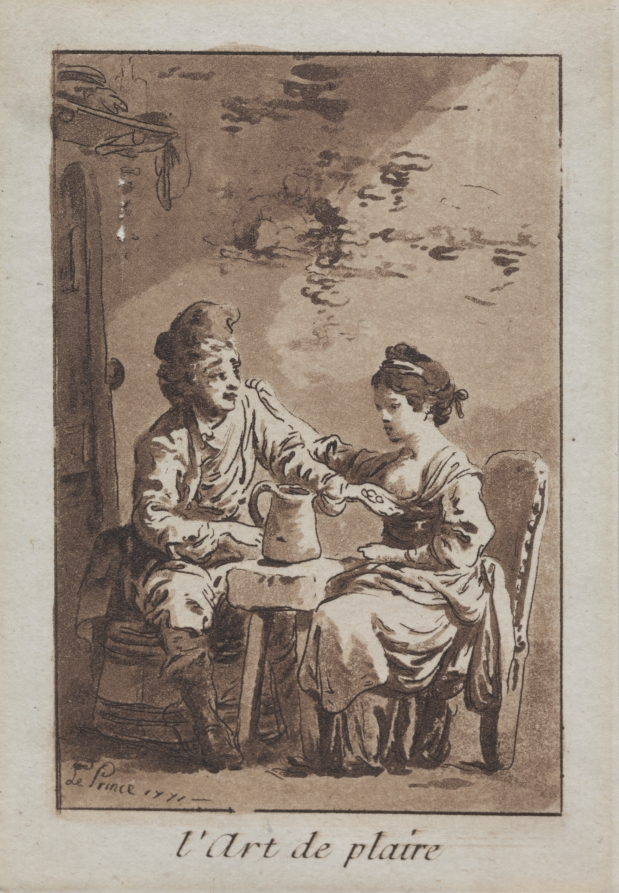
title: The Art of Pleasing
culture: France, 18th century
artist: Jean Baptiste Le Prince (French, 1734–1781)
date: 1771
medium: etching and aquatint printed in brown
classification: Print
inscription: signed and dated in the plate: Le Prince 1771 (l.l.); Titled: L'Art de plaire (l.c.)